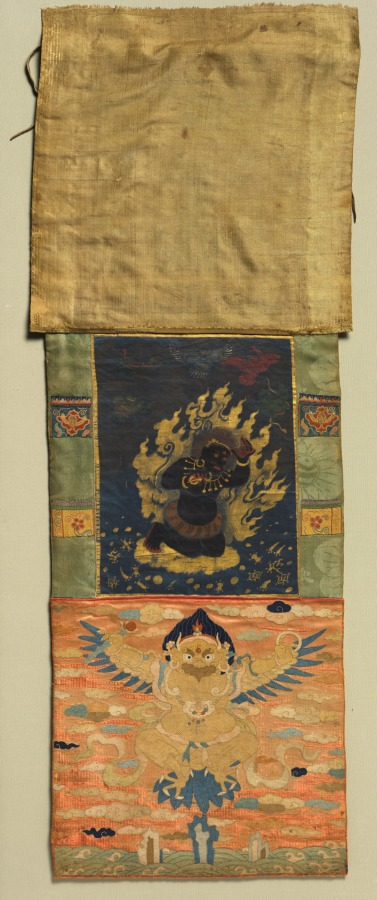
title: Vajrapani and Garuda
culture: China and Tibet, Embroidery: China, Yuan dynasty (1279–1368); painting: Tibet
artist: attributed to Choying Dorje, the Tenth Black Hat Karmapa (Tibetan, 1604–1674)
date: painting c. 1650; top and bottom borders c. 1350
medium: Painting: gum tempera, gold, and silver on silk; lateral borders: silk damask with needleloop embroidery; top and bottom panels: embroidered silk, lead, and silver paper; curtain: silk tabby; dowels: wood, rawhide, and leather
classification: Embroidery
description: The painting depicts the Buddhist protector who holds (pani) the thunder bolt (vajra) in his right hand. He kneels in reverence and holds his left hand in a gesture of salute. This unusual image appears to have been the vision of a Tibetan monastic patriarch known for creating his own inventive paintings and sculptures. Sewn to the painting are Chinese damask borders and rare embroideries dating to the Chinese Yuan dynasty (1279–1368). They depict man-eagle figures known as Garuda, a form occasionally assumed by Vajrapani.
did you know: Vajrapani sometimes takes the form of Garuda, enemy of snakes.